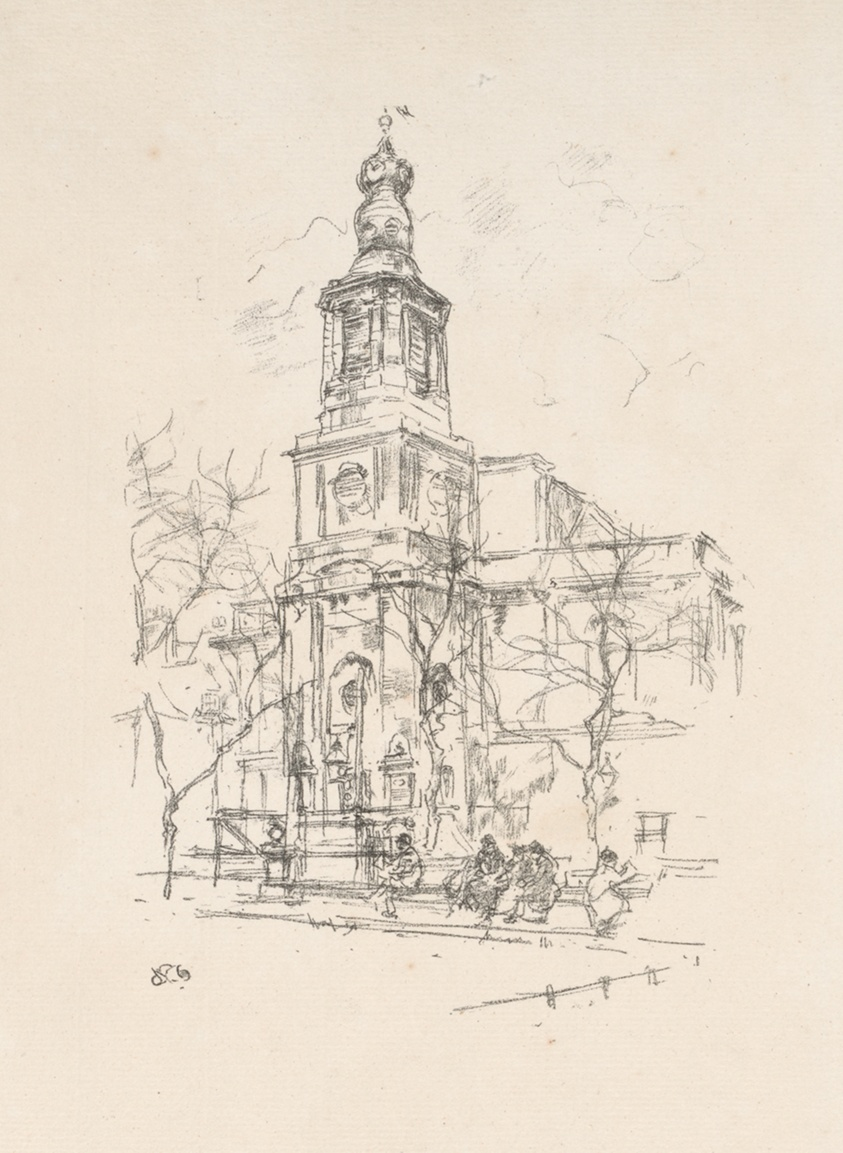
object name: Print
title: St. Anne's, Soho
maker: James McNeill Whistler (American, 1834-1903)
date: 1896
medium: Transfer lithograph in black on ivory laid paper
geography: United States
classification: transfer lithograph; lithograph; print; prints and drawing; paper